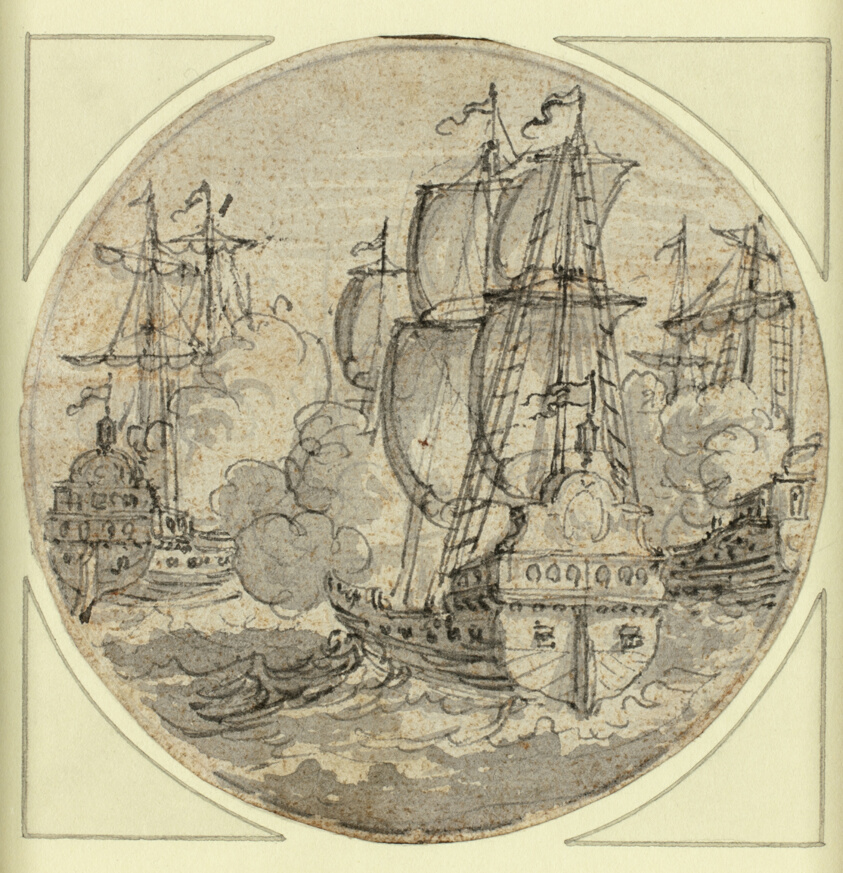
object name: Drawing and Watercolor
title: Ship at Sail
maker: Unknown Artist; Dutch, 17th century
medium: Pen and black ink and brush and gray wash, over graphite, with traces of red chalk, on ivory paper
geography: Netherlands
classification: pen and ink drawings; prints and drawing; paper